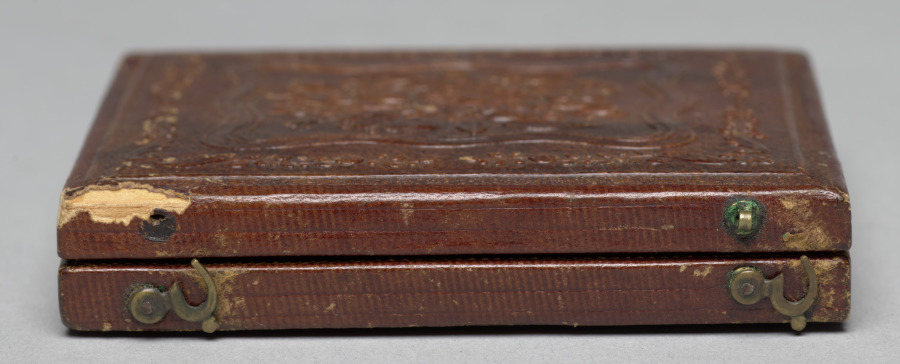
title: Crowd with sleigh in front of LL & ER Smith store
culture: America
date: c. 1858–65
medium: ambrotype, sixth plate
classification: Photograph